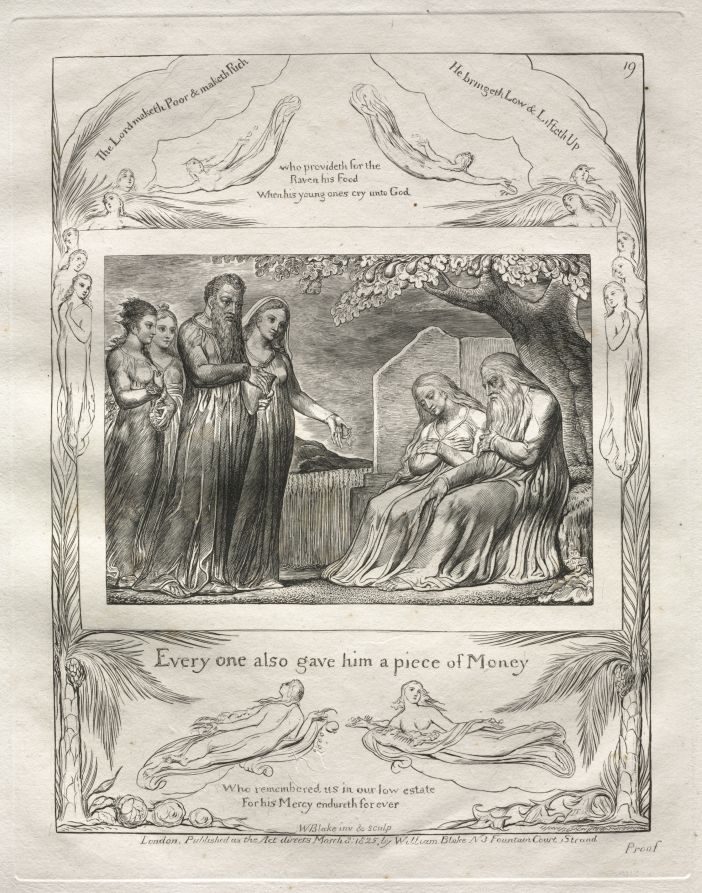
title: The Book of Job: Pl. 19, Every one also gave him a piece of Money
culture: England, 18th century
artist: William Blake (British, 1757–1827)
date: 1825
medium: engraving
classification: Portfolio